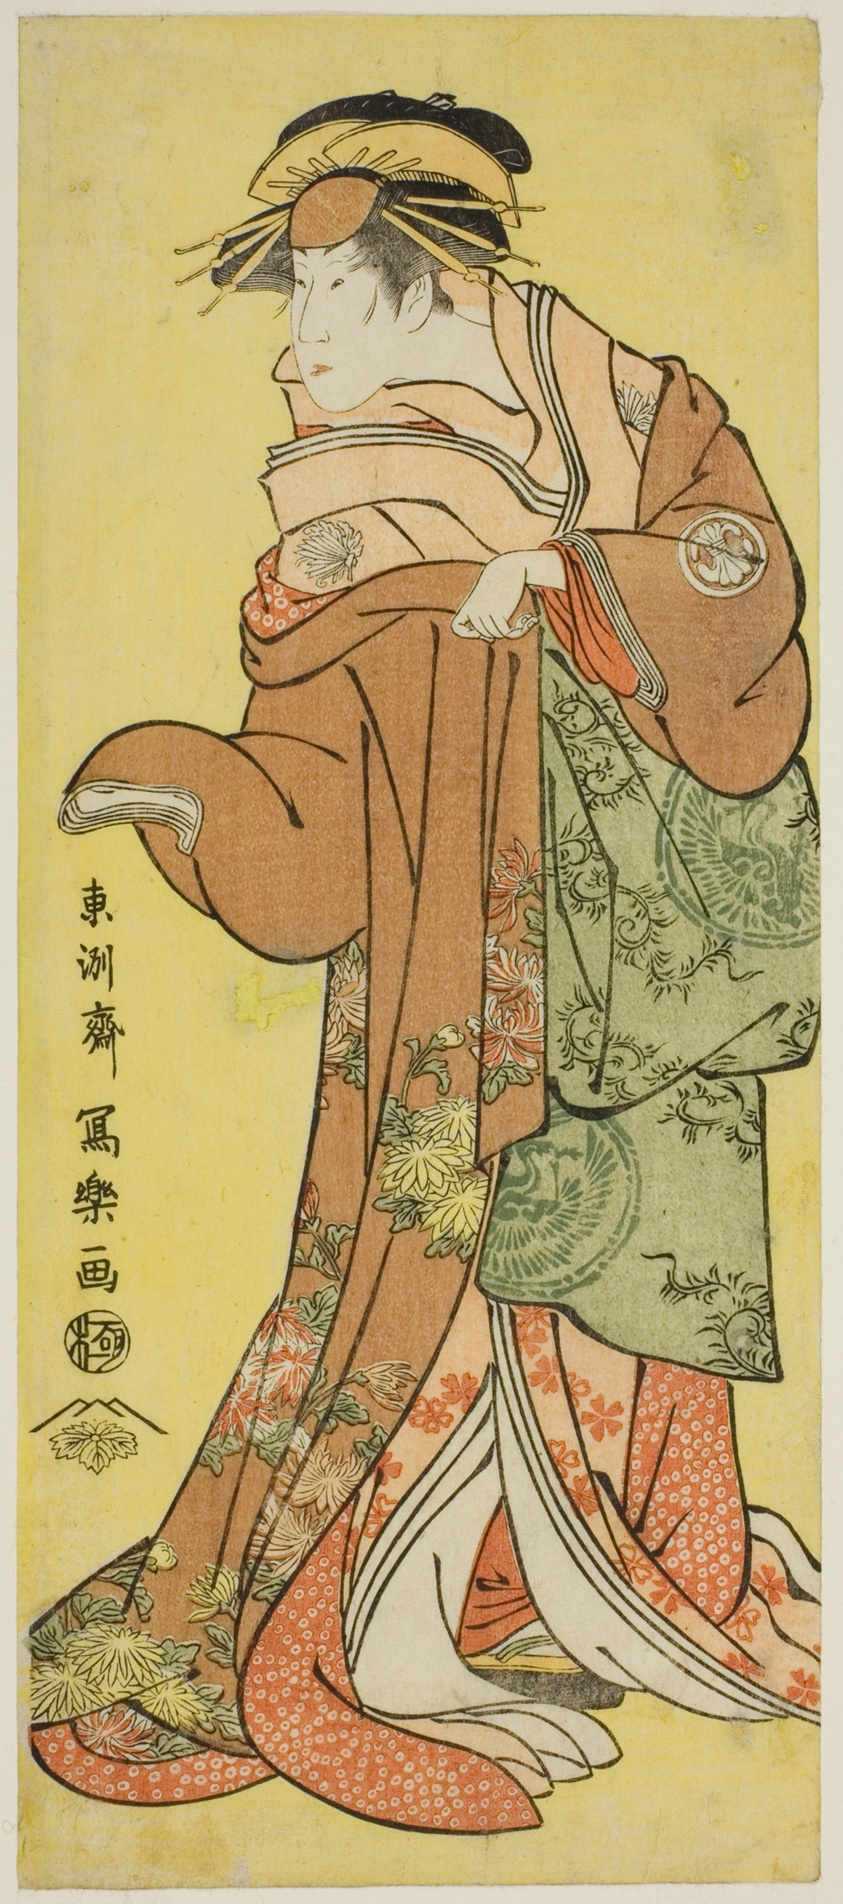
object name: Print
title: Segawa Kikunojo lll in the Role of Courtesan Katsuragi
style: Japanese (culture or style)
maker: Toshusai Sharaku 東洲斎 写楽; Japanese, active 1794-95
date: c. 1795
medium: Color woodblock print; hosoban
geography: Japan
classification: woodblock print; print; asian art